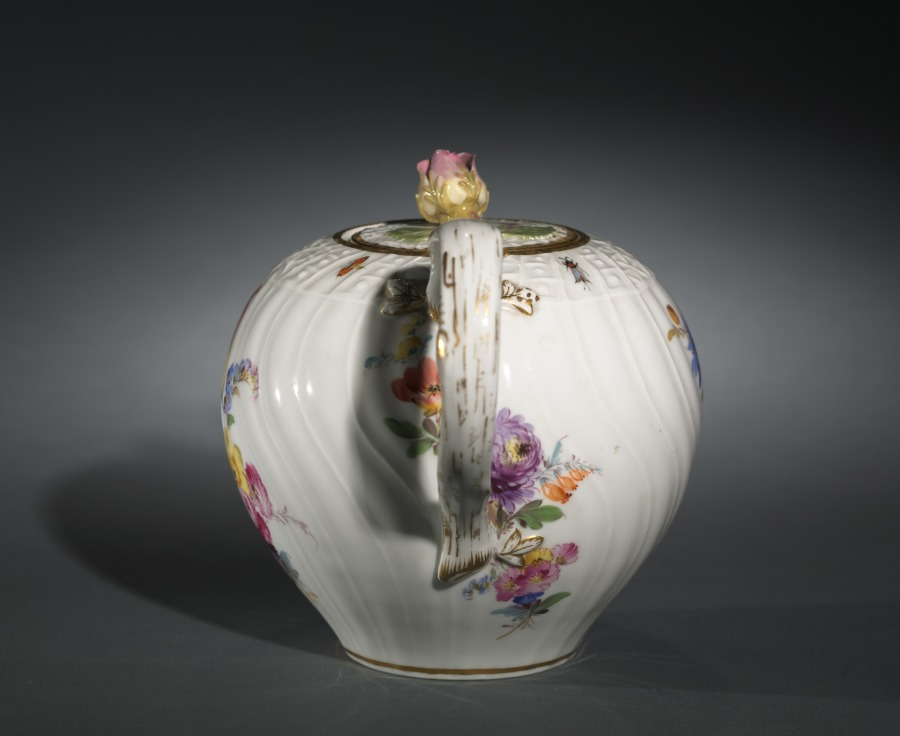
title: Teapot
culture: Germany, Meissen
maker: Meissen Porcelain Factory (German, est. c. 1710)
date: c. 1750–70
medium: porcelain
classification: Ceramic